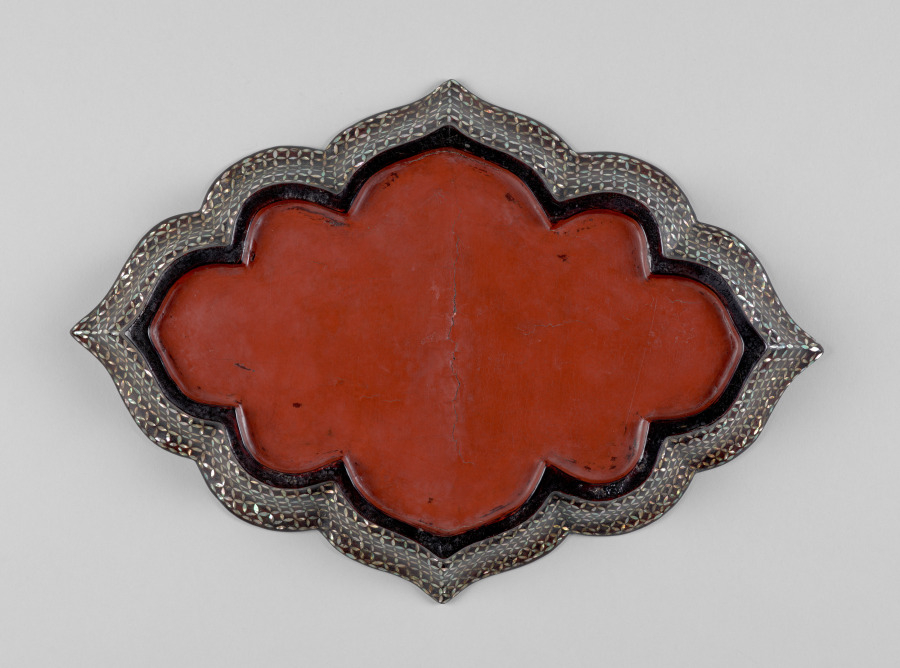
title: Foliate-Shaped Tray with Mother-of-Pearl Inlay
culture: Korea, Joseon dynasty (1392–1910)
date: late 1400s–early 1500s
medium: Inlaid abalone shells on black lacquer ground, applied with red lacquer on the interior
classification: Lacquer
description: Since the Goryeo dynasty, Korean mother-of-pearl lacquerware has been admired for its refinement, though few early examples survive. This tray, datable to the late 1400s or early 1500s, is exceptional for both rarity and condition. Its foliate form, peony vine motif, and intricate lattice border—originally derived from Goryeo-period decorative arts—are exquisitely reinterpreted through the refined craftsmanship of early Joseon artisans.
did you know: This tray’s intricately decorated surface was created through a labor-intensive inlay technique employing thin, precisely cut abalone shell.